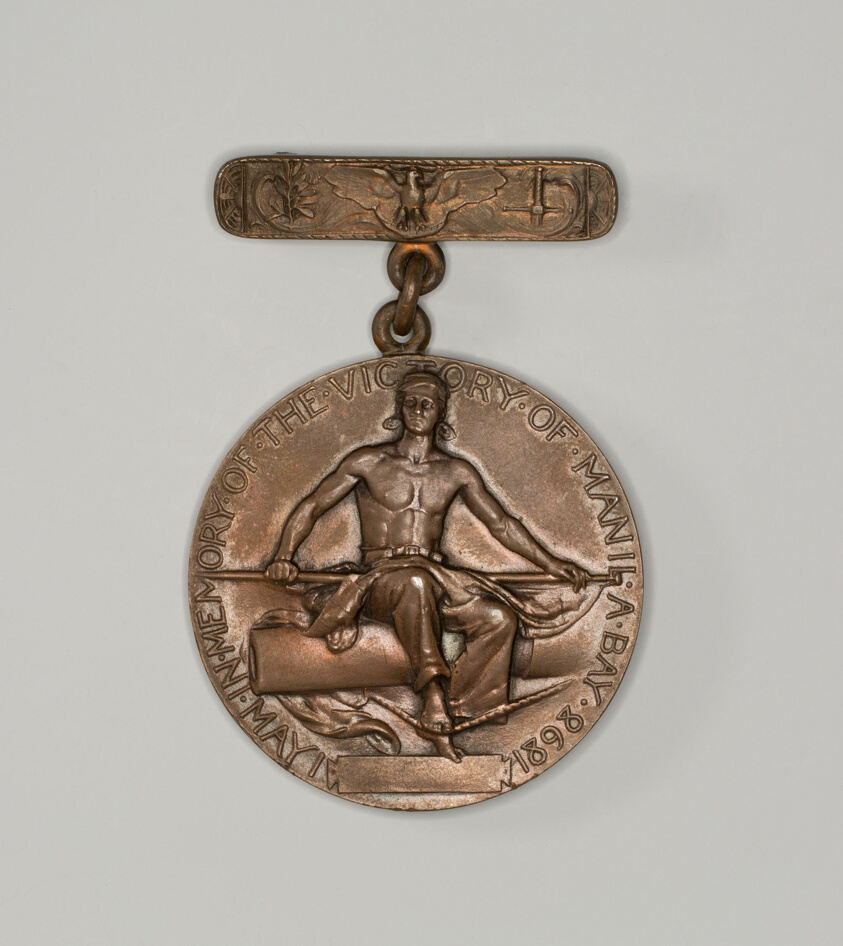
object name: Metalwork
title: Dewey medal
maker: Daniel Chester French (American, 1850–1931); Tiffany and Company (American, founded 1837); New York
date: c. 1898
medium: Bronze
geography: New York City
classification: medal; american arts; decorative arts